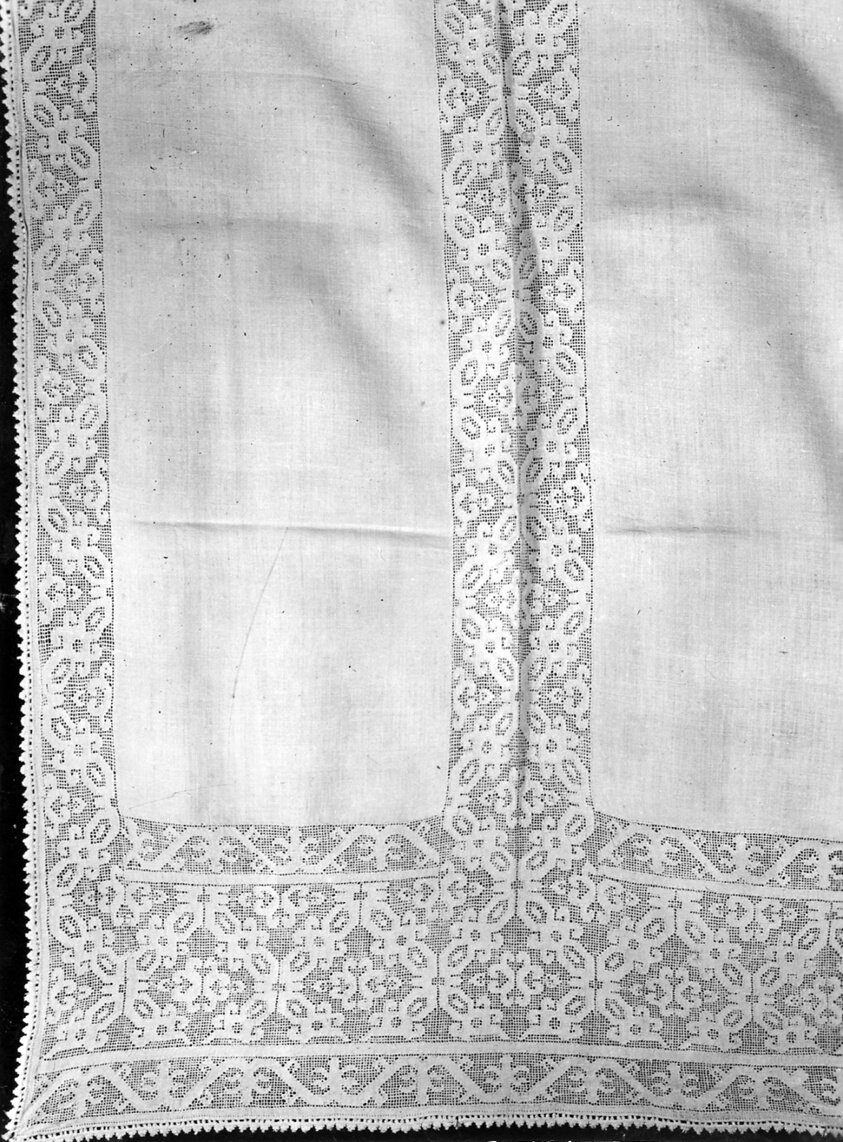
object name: Religious/Ritual Object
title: Altar Cover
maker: Italy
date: 18th century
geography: Italy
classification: textile; needlework (visual works); altar; ritual objects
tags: altar